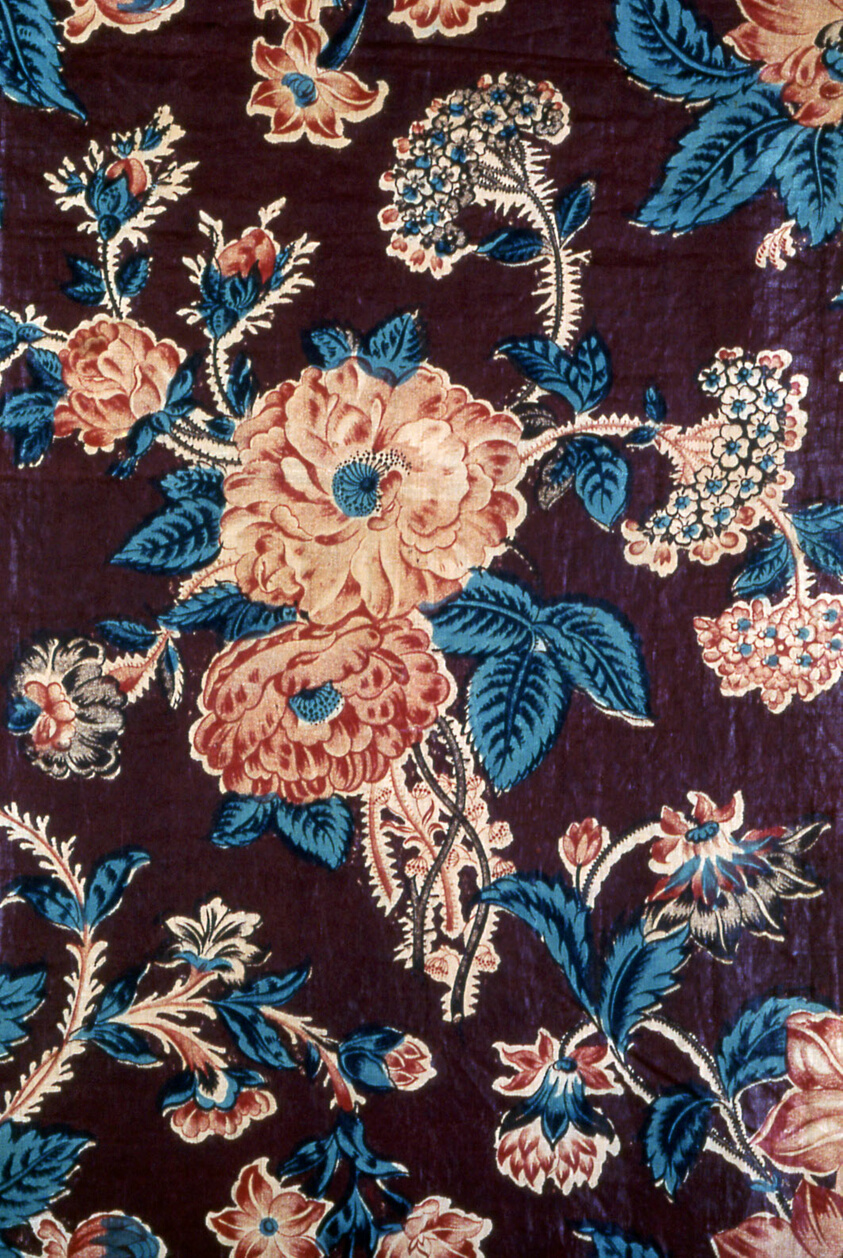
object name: Textile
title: Two Panels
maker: France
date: 19th century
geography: France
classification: textile; weaving - printed